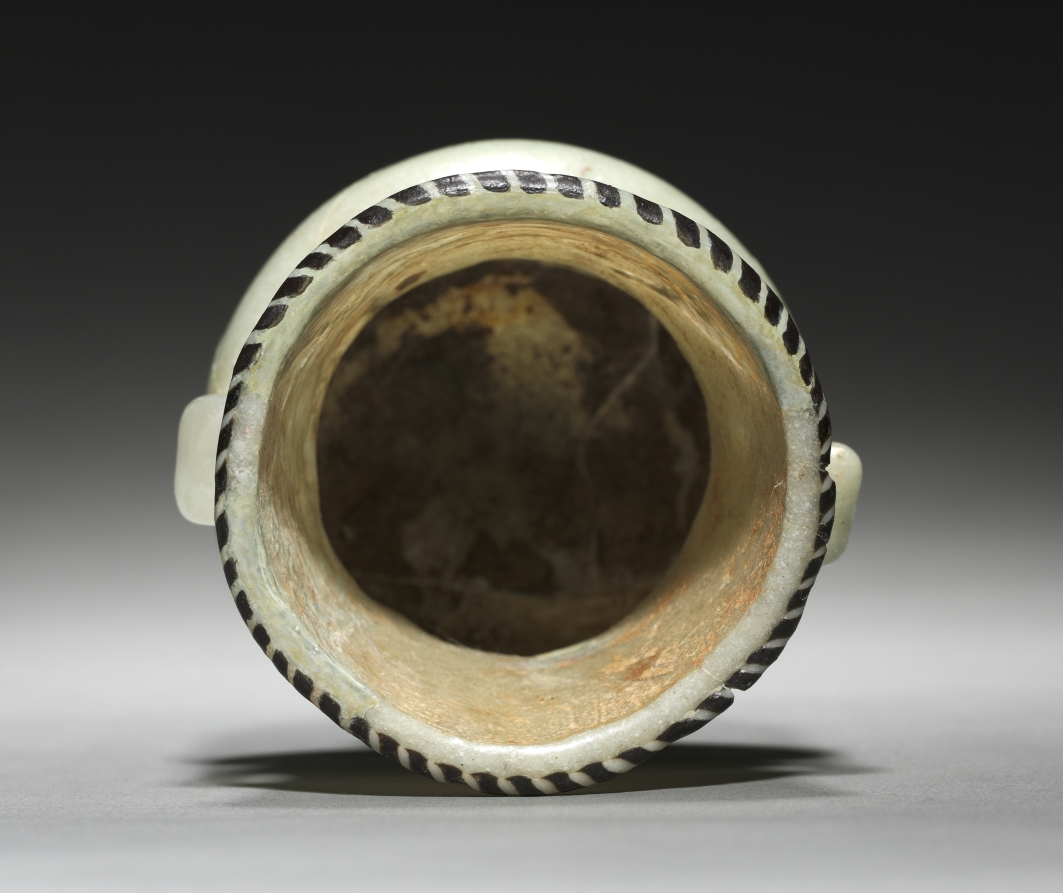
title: Unguent Bottle (Krateriskos)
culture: Egypt, New Kingdom (1540–1069 BCE), Dynasty 18, post-Amarna period or later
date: c. 1336–1295 BCE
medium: glass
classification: Vessels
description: This was probably the most popular type of Egyptian glass vessel. The milky white to sea green-colored fabric and monochrome decorative scheme are reminiscent of Egyptian alabaster. That the Egyptians would make an association between glass and stone is only natural, as the Egyptian name for glass was inr n(y) wdh or "the flowing stone."